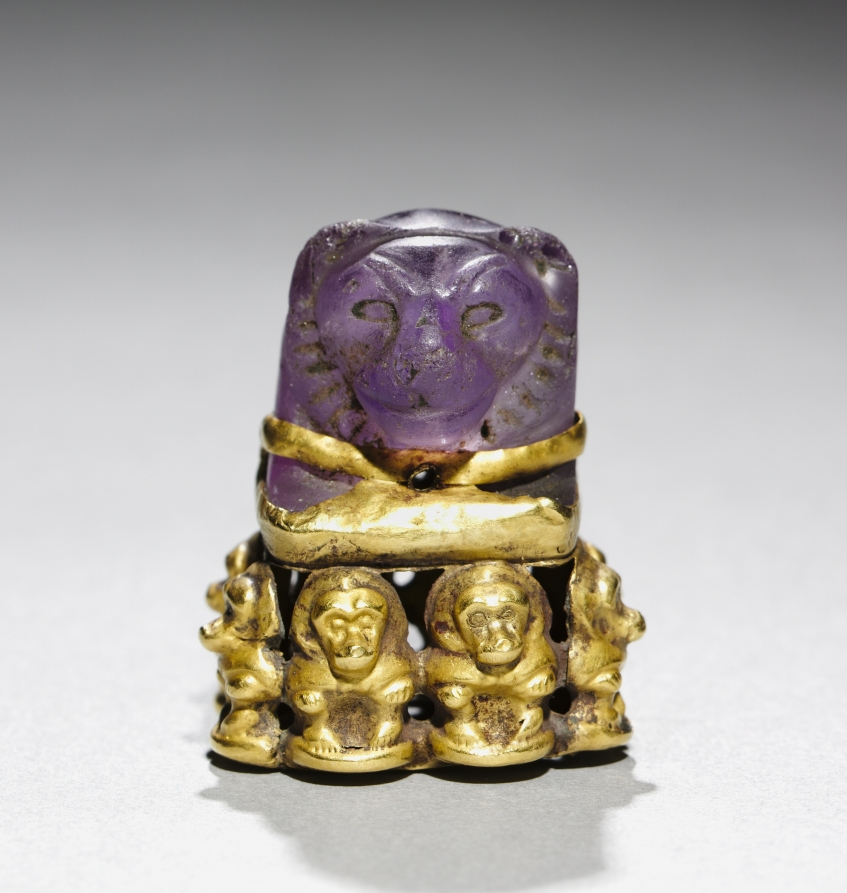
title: Pendant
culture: Sudan, Napatan; lion's head component: probably Egypt, Third Intermediate (1069–715 BCE), Dynasty 25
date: c. 700 BCE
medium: amethyst and gold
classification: Jewelry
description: This pendant consists of two parts: a superbly carved lion’s head in amethyst that has been set into a D-shaped gold base consisting of a platform surrounded by eight seated baboons. The lion’s head is an heirloom from the New Kingdom, most likely a gaming piece that had been adapted in the Napatan period to serve as an pendant amulet. This procedure was fairly common in antiquity as a means of recycling precious stones. The importance of leonine deities in Nubian religion was obviously the motivating force behind the creation of this spectacular ornament.